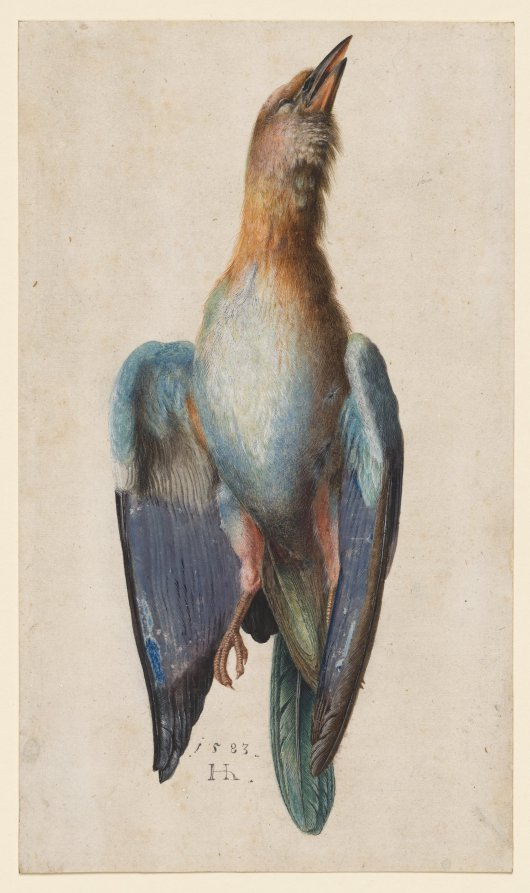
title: Dead Blue Roller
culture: Germany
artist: Hans Hoffmann (German, 1545/50–1591/92)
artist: after Albrecht Dürer (German, 1471–1528)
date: 1583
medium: watercolor and gouache with touches of gold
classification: Drawing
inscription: signed, lower center, in gray ink: 1583 / [artist's monogram: Hh]; verso, upper left, in ink (?, visible through transmitted light): 182 [sideways]; upper right, in ink (?): 7 [illegible]; center left, in ink (?): 182; lower left, in ink (?): [11?]; lower center, in ink (?): 50; verso of secondary support, lower right, in graphite: 3.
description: Half a century after the death of the German Renaissance artist Albrecht Dürer, his work continued to inspire artists and collectors. Hans Hoffmann was well known for his copies of Dürer’s nature studies, and in 1583 he faithfully copied Dürer’s celebrated drawing of a dead blue roller of 1512 in this exquisite watercolor. A network of very fine brushstrokes imitates the individual plumes of the bird’s underside while simultaneously suggesting an overall soft, downy texture. Several other copies of Dürer's composition exist, including one by Hoffmann in London. Both the London sheet and this sheet were signed with Hoffman’s prominent monogram and dated, indicating that he could not have intended them to pass as originals by the older master. Likely, he meant the drawing as an homage to the greatest German artist of the 1500s; his endeavor may have been sponsored by the Nuremberg-based Imhoff family, who owned Dürer's blue roller around the time this drawing was made.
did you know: This realistic portrait of a dead bird signals a turn toward objective depictions of nature in the 1500s.